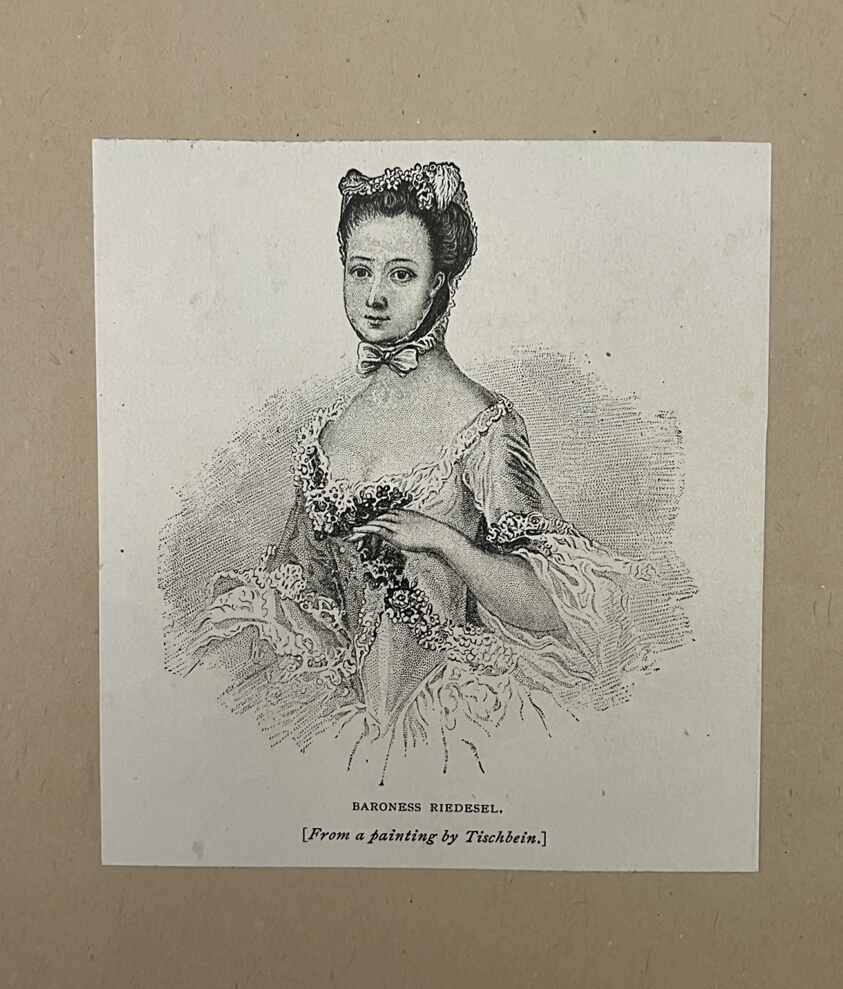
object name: Print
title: Baroness Riedesel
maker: Likely John Chester Buttre (American, 1821-1893); after Johann Friedrich August Tischbein (German, 1750-1812)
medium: Lithograph on paper pasted on paper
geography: United States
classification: reproduction; print; prints and drawing